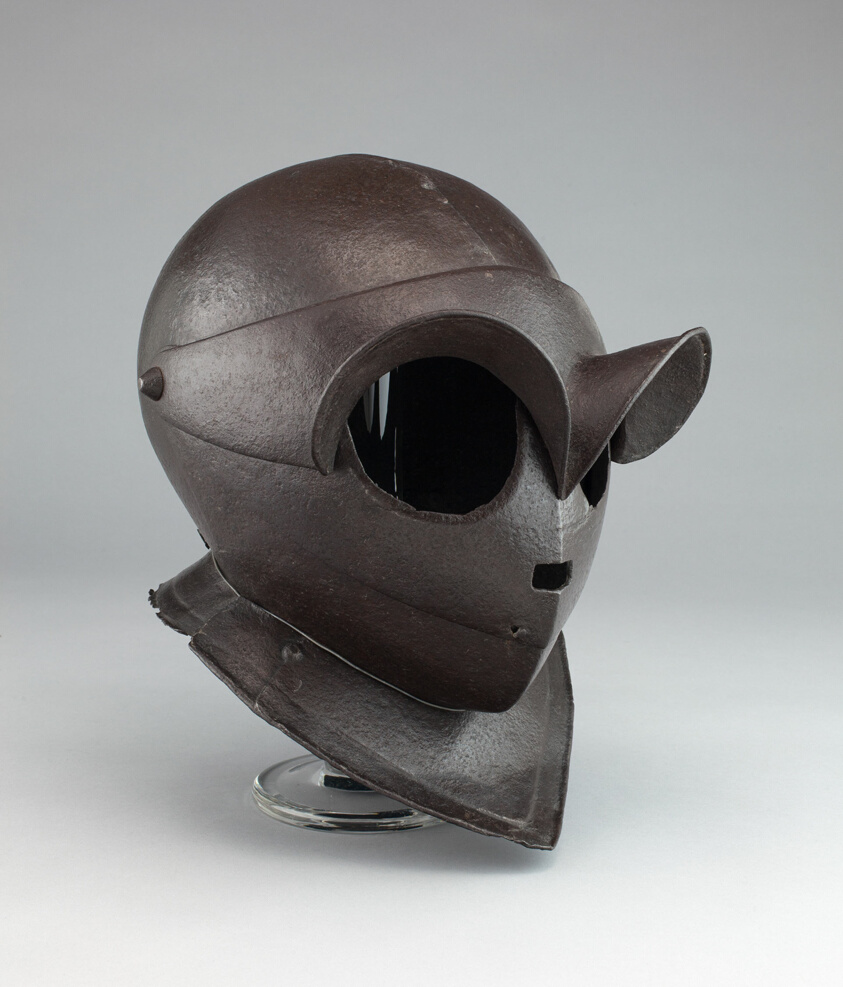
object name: Armor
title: Siege Helmet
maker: Probably Italian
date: 1610/20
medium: Steel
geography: Italy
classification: suit-helmet; armor; arms and armor